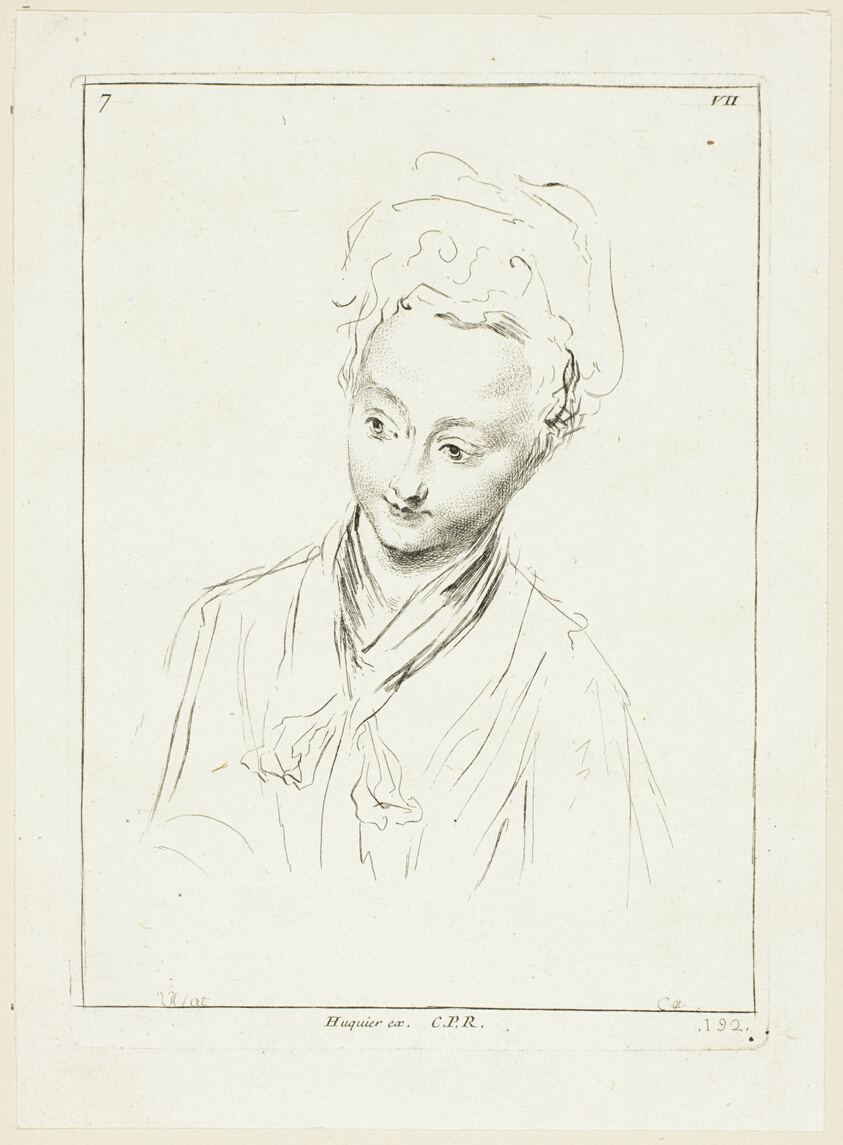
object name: Print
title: Woman's Head (turned to right)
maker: Anne Claude Philippe Caylus (French, 1692-1765)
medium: Etching and engraving on paper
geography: France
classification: etching; print; prints and drawing